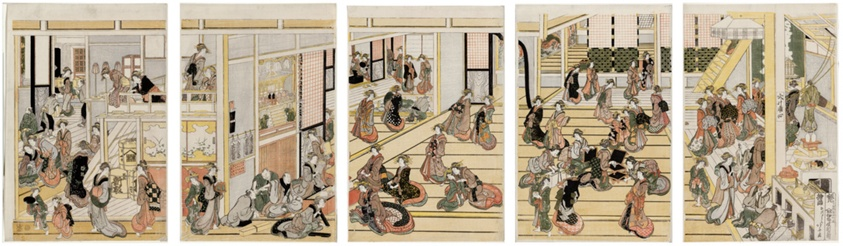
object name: Print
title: New Year's Day at Ogi-ya brothel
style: Japanese (culture or style)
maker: Katsushika Hokusai 葛飾 北斎; Japanese, 1760-1849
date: 1811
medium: Color woodblock prints; oban pentaptych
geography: Japan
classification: woodblock print; print; asian art